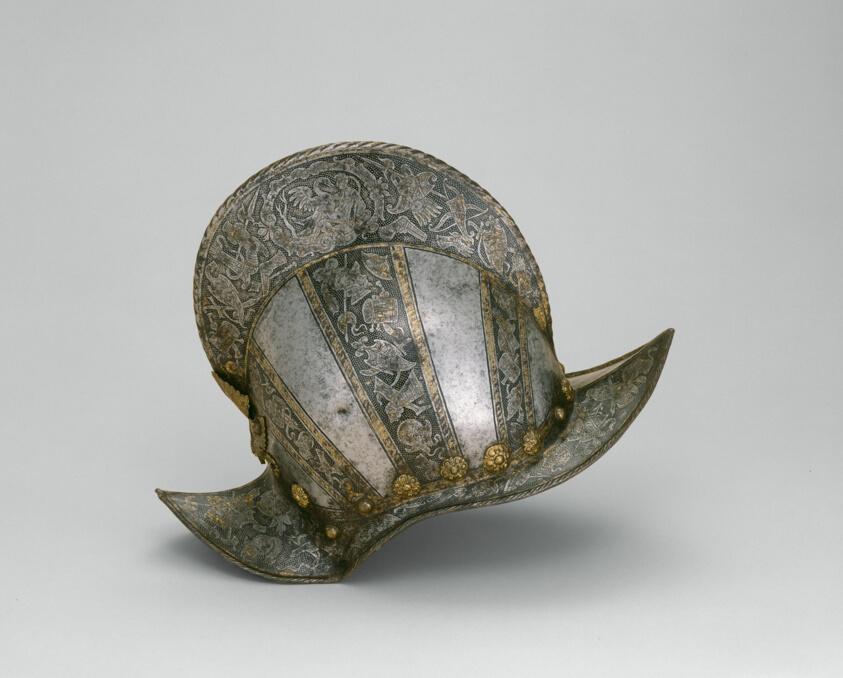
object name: Armor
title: Morion-Burgonet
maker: Southern German, probably Augsburg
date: 1585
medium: Steel, gilding, and brass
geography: Augsburg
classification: suit-helmet; armor; arms and armor